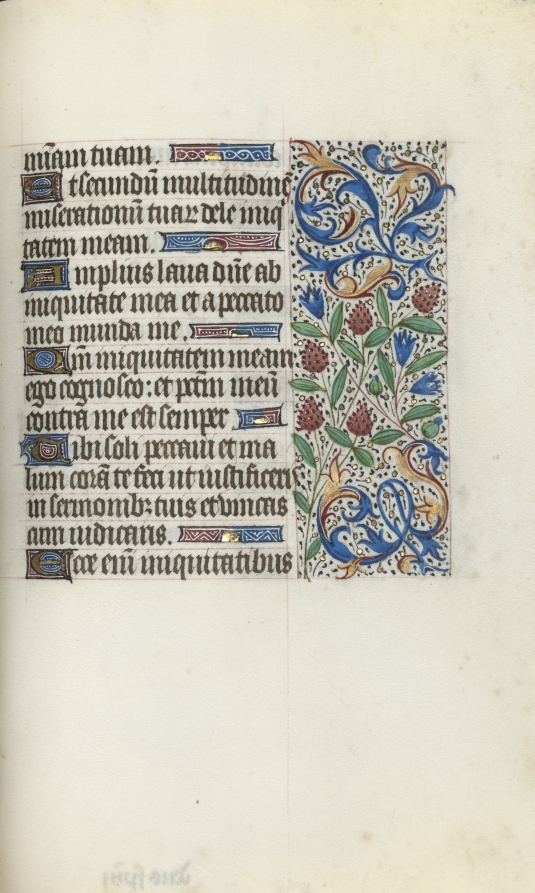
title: Book of Hours (Use of Rouen): fol. 134r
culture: France, Rouen, 15th century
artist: Master of the Geneva Latini (French, active Rouen, 1460–80)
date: c. 1470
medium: ink, tempera, and gold on vellum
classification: Bound Volume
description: In the late 1400s and early 1500s Rouen was an established and important center of book production. The city’s cathedral had a wealthy chapter that spent large sums of money to commission books and to maintain its extensive library. The stationers and booksellers would have likely been concentrated in or near the cathedral precinct. This artist, named after a manuscript now in Geneva, was Rouen’s principal illuminator during the second half of the 1400s.